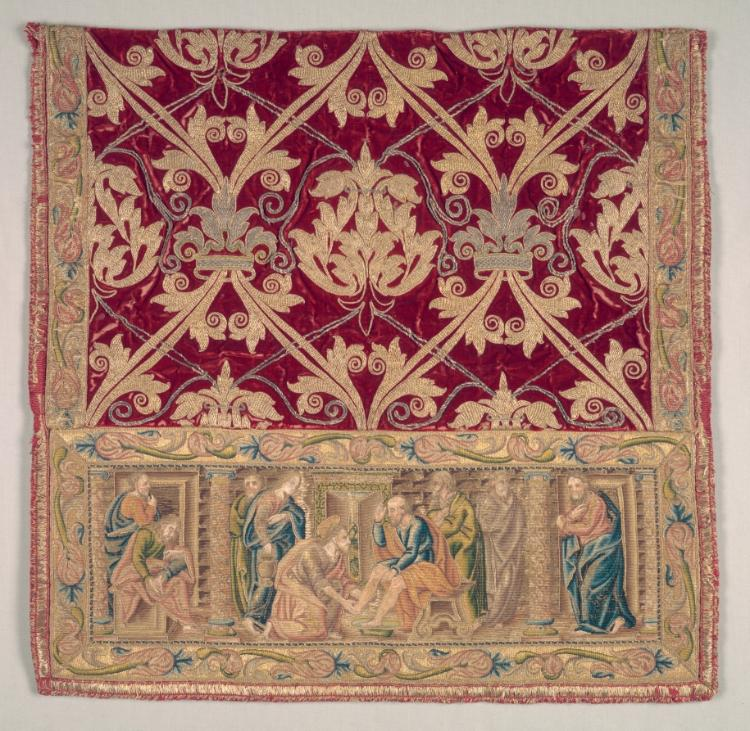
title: Embroidered Sleeve from a Dalmatic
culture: Italy, Florence, 16th century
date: 1500–1525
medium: Silk, gold and silver thread; velvet, embroidery: or nué (shaded gold), split, satin, and couching stitches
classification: Textile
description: This sleeve belonged to an ecclesiastical garment called a dalmatic. Gold and silver thread form overlapping lattices with crowns on crimson velvet. In the scene, Christ washes the feet of Peter, who is accompanied by other apostles. Gold thread dominates, in the shaded-gold technique (or nué), its brilliance varying based on the density of the silk thread crossing over it. The resulting high quality could only have been achieved by a master embroiderer working from a good painter’s design.